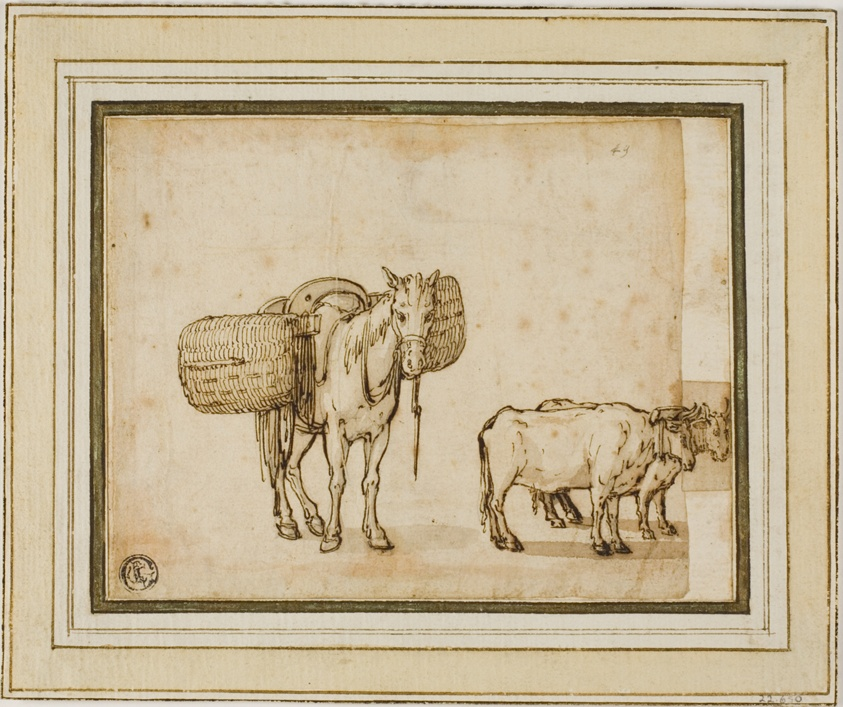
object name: Drawing and Watercolor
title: Two Sketches: Mule Carrying Baskets, Pair of Yoked Oxen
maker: Attributed to Cornelis de Wael (Flemish, 1592-1667); or Remigio Cantagallina (Italian, 1582-1656)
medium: Pen and brown ink with brush and brown wash, over traces of black chalk, on ivory laid paper, pieced and laid down on ivory laid paper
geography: Flanders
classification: pen and ink drawings; drawings (visual works); prints and drawing